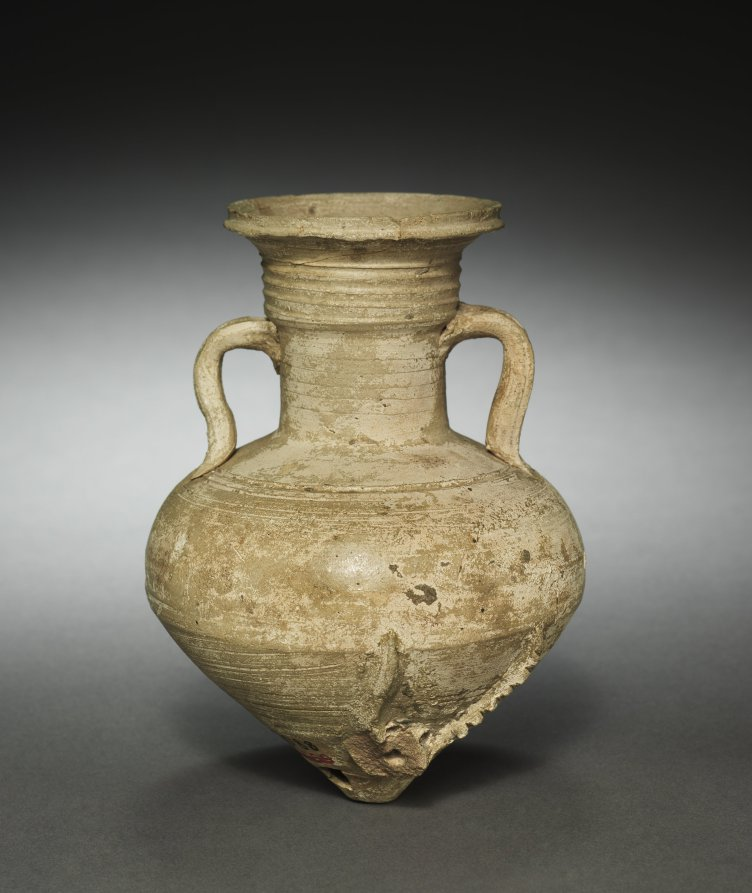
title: Vase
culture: Parthian Empire (247 BCE–224 CE)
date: 1–200 CE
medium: terracotta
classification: Ceramic